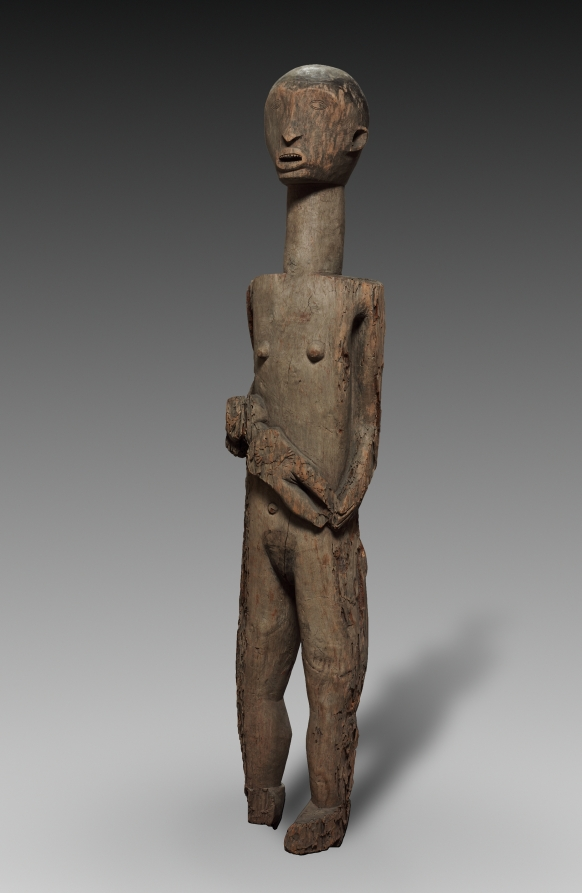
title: Figure of a Pair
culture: Africa, Central Africa, Democratic Republic of the Congo or Central African Republic (most likely), possibly Monzombo-style maker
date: late 1800s–early 1900s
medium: Wood and iron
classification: Sculpture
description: The Ubangi region's history of successive migrations and assimilations has resulted in numerous exchanges of religious beliefs and ritual practices. Despite some stylistic traits, including the heart-shaped faces and the male's crested coiffure, this figure with its female pair is unlike any other in the Ubangian corpus. Based on indirect evidence, the pair is said to represent the culture's primordial couple.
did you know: There are no other carved mother-child figures that originate from the Monzombo ethnic group.